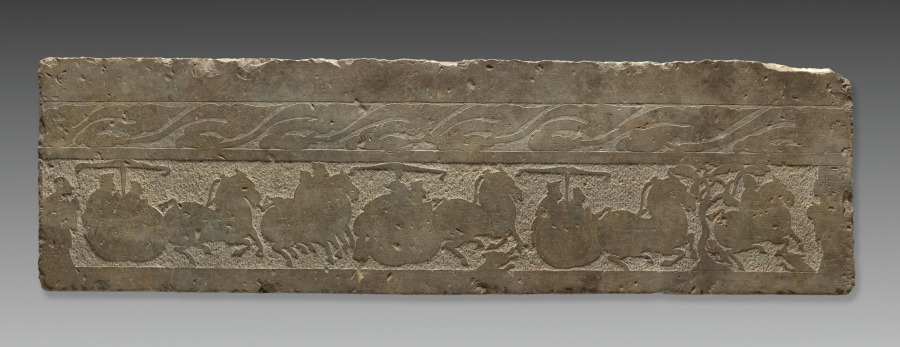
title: Frieze Fragment with Chariot Procession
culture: China, style of Wu Family Shrines, Jiaxiang district, Shandong province, Eastern Han dynasty (25–220 CE)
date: 100s CE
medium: stone carved in low relief with engraved detail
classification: Sculpture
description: The frieze shows a procession of horse-drawn chariots passing through terrain animated with wild animals and a monkey climbing a tree. The border of swirling clouds above conveys associations with heaven or the remote land of immortals in the high mountains. Comparable in style with the stone reliefs of the Wu Family shrines, this stone may have been originally carved for a local Eastern Han dynasty family tomb of similar status. To take a rubbing of the frieze, a moistened sheet of paper is laid over the slab and tamped with an ink pad that then darkens the raised areas, leaving concave sections and incised lines blank.